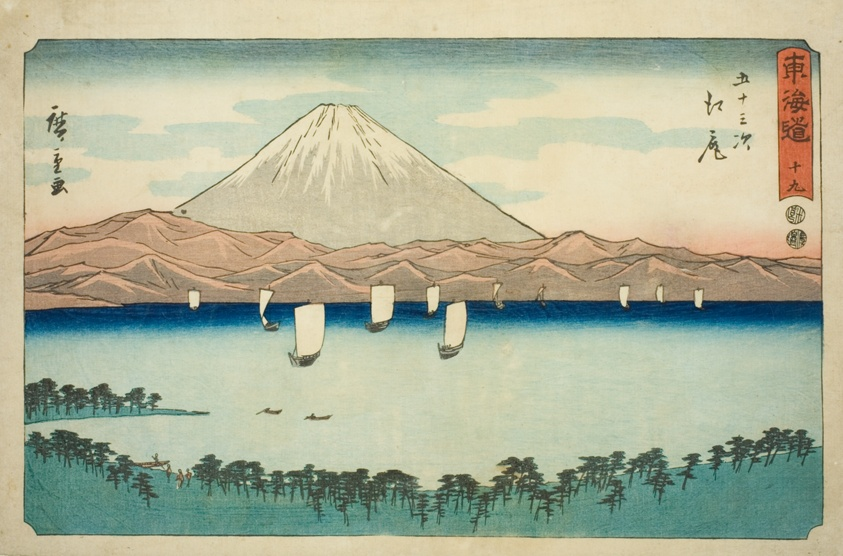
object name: Print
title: Ejiri—No. 19, from the series "Fifty-three Stations of the Tokaido (Tokaido gojusan tsugi)," also known as the Reisho Tokaido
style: Japanese (culture or style)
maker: Utagawa Hiroshige 歌川 広重; Japanese, 1797-1858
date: c. 1847/52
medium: Color woodblock print; oban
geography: Japan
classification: woodblock print; print; asian art